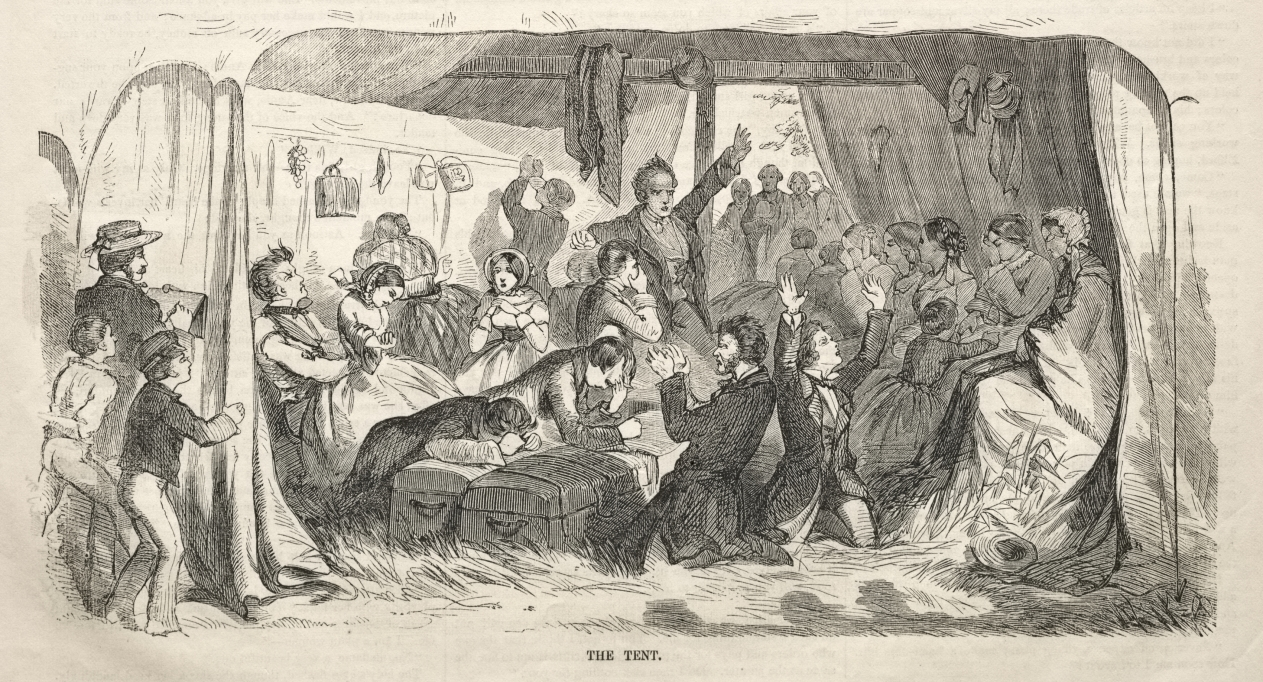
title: Camp Meeting Sketches: The Tent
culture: America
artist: Winslow Homer (American, 1836–1910)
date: 1858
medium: wood engraving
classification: Print